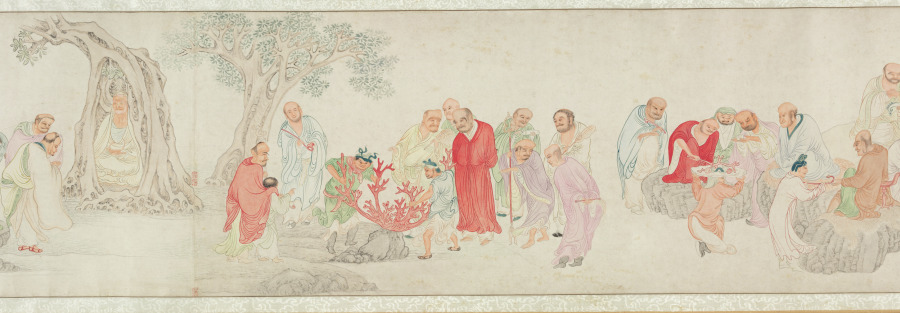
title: The Five Hundred Arhats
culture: China, Ming dynasty (1368–1644)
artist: Wu Bin (Chinese, active c. 1591–1626)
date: 1591–1626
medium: Handscroll; ink and color on paper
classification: Painting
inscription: 枝隱頭陀吳彬齋心拜寫 [印]吳彬之印; 文中父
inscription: 7 seals of Qianlong emperor (r. 1736–95): Gu xi tian zi 古希天子; Shou 壽; Qianlong jian shang 乾隆鑑賞; San xi tang jing jian xi 三希堂精鑑璽; Yi zi sun 宜子孫; Tai shang huang di zhi bao 太上皇帝之寳; Qian qing gong bao 乾清宮寶.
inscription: 6 seals of Cheng Qi 程琦 (1911–1988): Ke an geng zi wu shi yi hou suo de ming ji 可菴庚子五十以後所得名跡; 5 other Cheng Qi seals.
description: More than 66 feet long, this handscroll depicts 447 luohans, 72 attendants, and the bodhisattva of compassion at its very end. Luohans (arhats in Sanskrit), disciples of the Buddha and protectors of the Buddha’s law, possess supernatural powers and take on myriad external appearances. The amusing assortment of characters are engaged in an array of religious, secular, and miraculous activities. The painter used stylistic features borrowed from earlier artists, carefully controlled lines, and refined coloring. Wu Bin was a lay Buddhist and depicting this sort of image was part of a religious practice seeking understanding of the Buddha’s teaching.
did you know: Far advanced on the path to enlightenment, arhats have the capacity to tame tigers, free dragons, and to float on water or in the air.